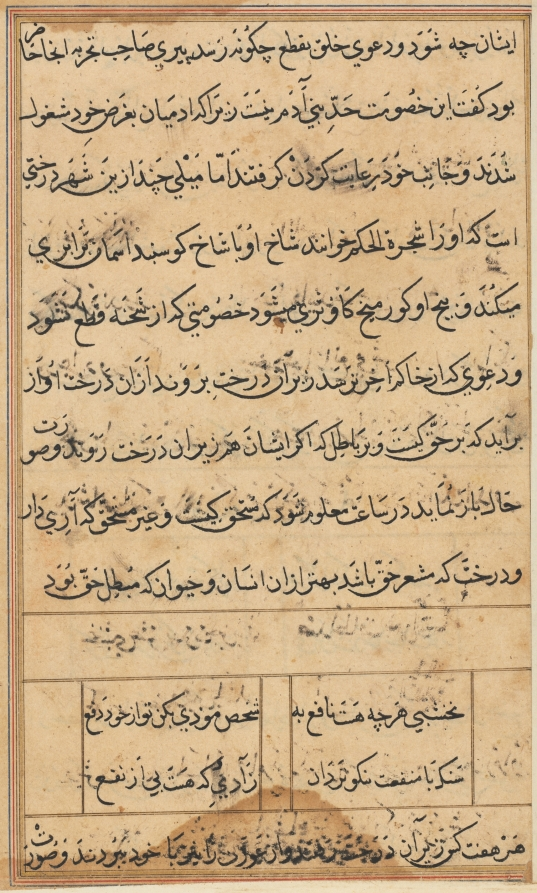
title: Page from Tales of a Parrot (Tuti-nama): text page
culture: Mughal India, court of Akbar (reigned 1556–1605)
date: c. 1560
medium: gum tempera, ink, and gold on paper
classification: Painting